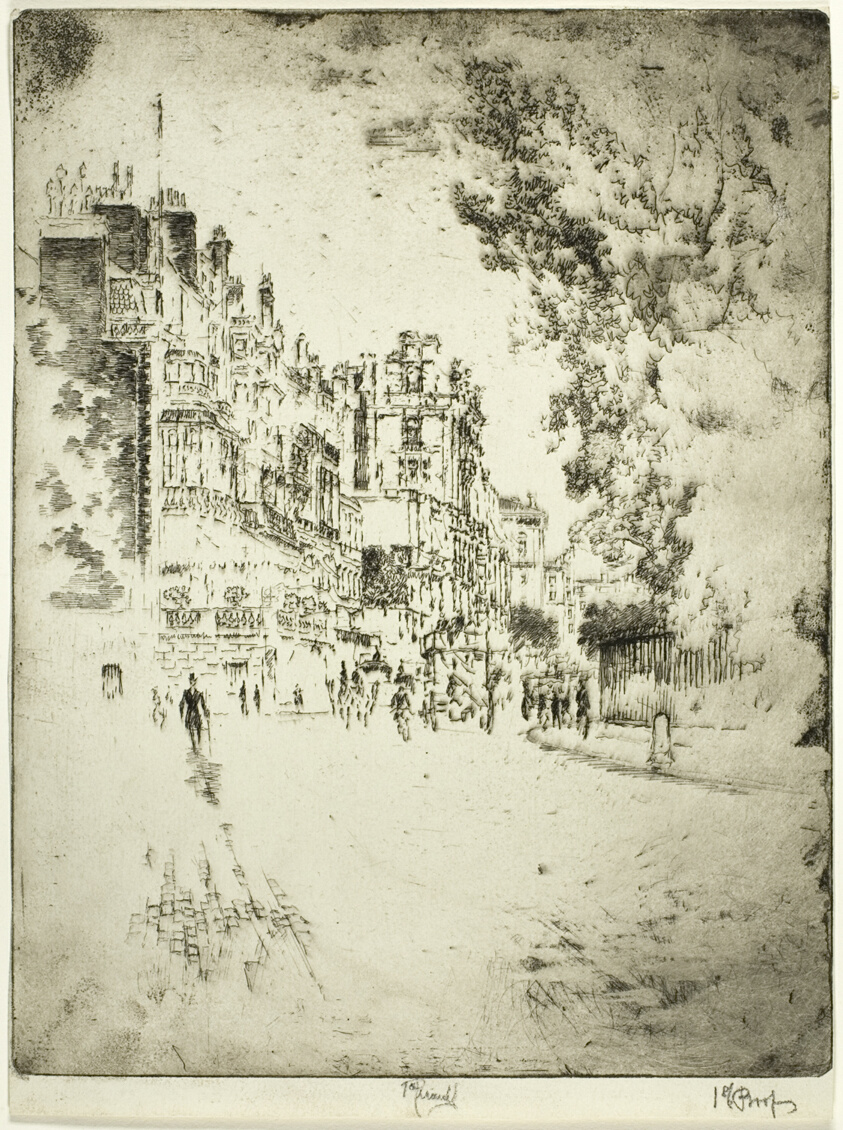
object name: Print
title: Park Lane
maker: Joseph Pennell (American, 1857-1926)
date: 1904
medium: Etching on ivory wove paper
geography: United States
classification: etching; print; prints and drawing